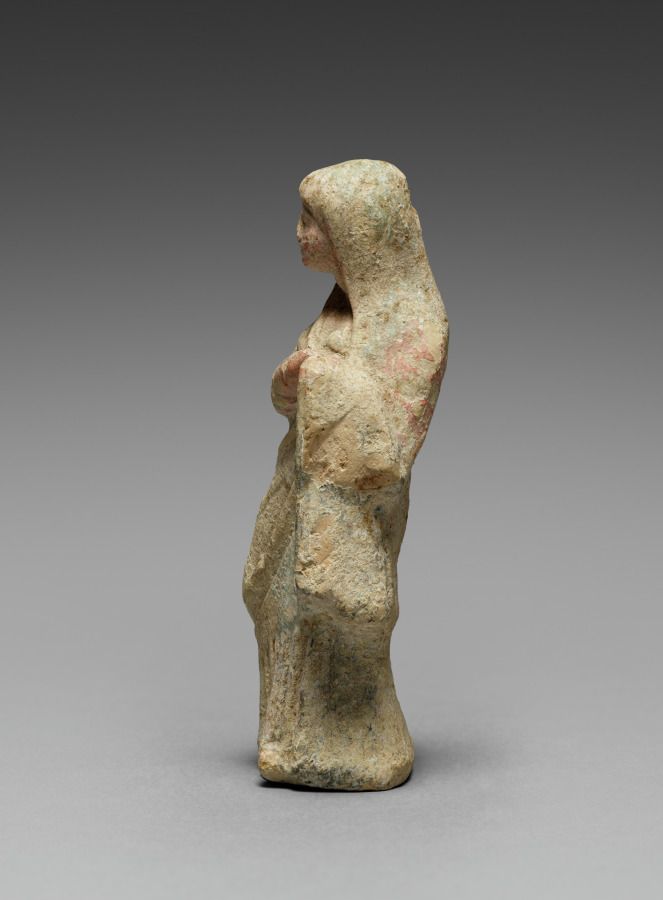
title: Figurine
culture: South Italy, Tarentum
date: 300–100 BCE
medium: terracotta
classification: Sculpture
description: Terracotta figurines like this one were popular throughout the ancient Mediterranean. This statuette takes the shape of a woman wearing a cloak or himation that twists around her form as she pulls it toward her left shoulder. Pigment is preserved in patches of red on the fabric over her arm. The figurine is mold-made, but only the front of the figure is modeled.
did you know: In ancient Greek art and literature, veiling the head or face was often a sign of αίδως (aidos), modesty or shame.